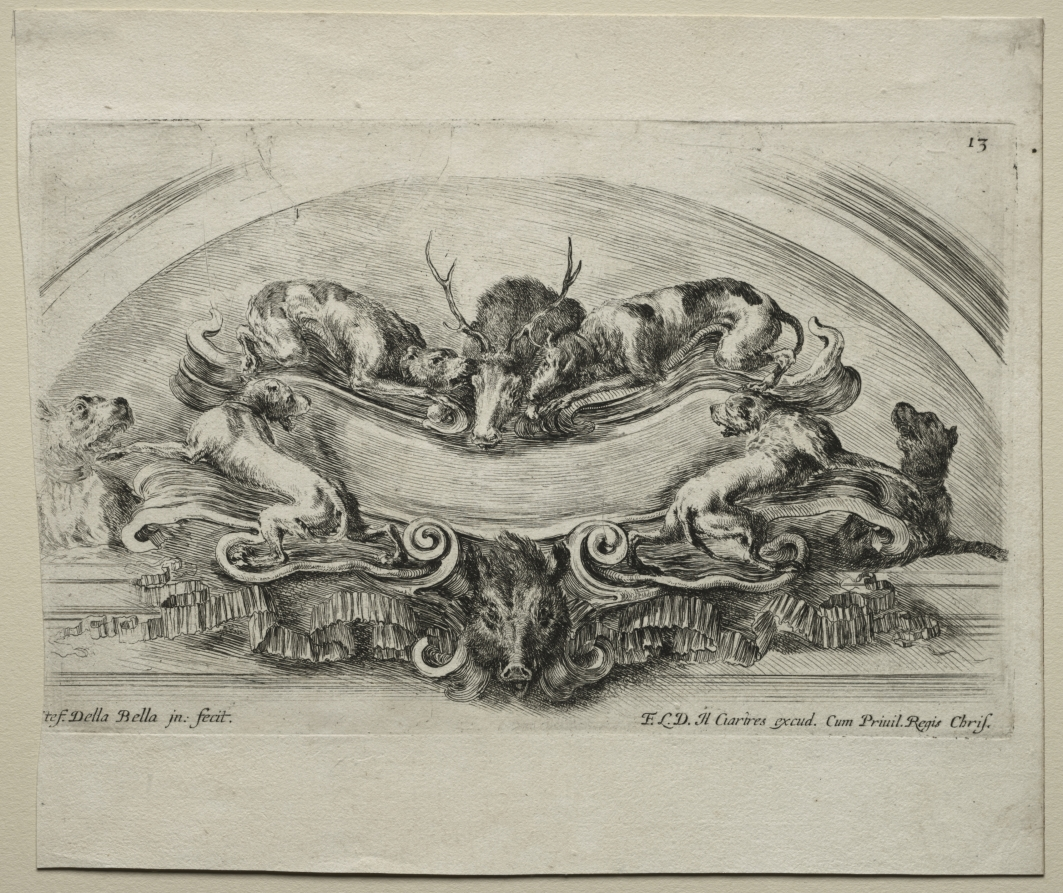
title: Collection of Various Caprices and New Designs of Cartouches and Ornaments: No 13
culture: Italy, 17th century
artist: Stefano Della Bella (Italian, 1610–1664)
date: 1646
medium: etching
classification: Print